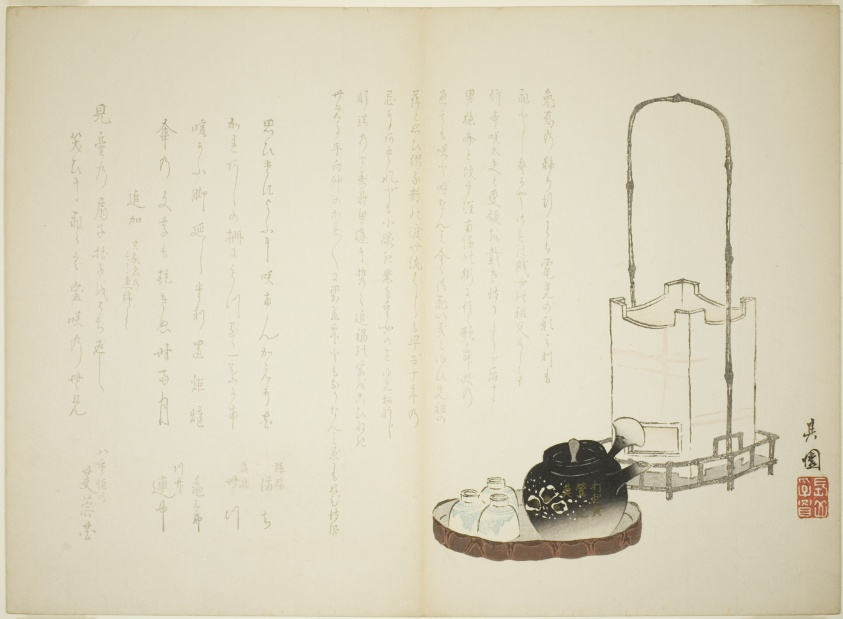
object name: Print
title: Takemoto-School Surimono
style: Japanese (culture or style)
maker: Nagayama Kien (Japanese, active 19th century)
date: 1847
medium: Color woodblock print; surimono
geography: Japan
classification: woodblock print; print; asian art